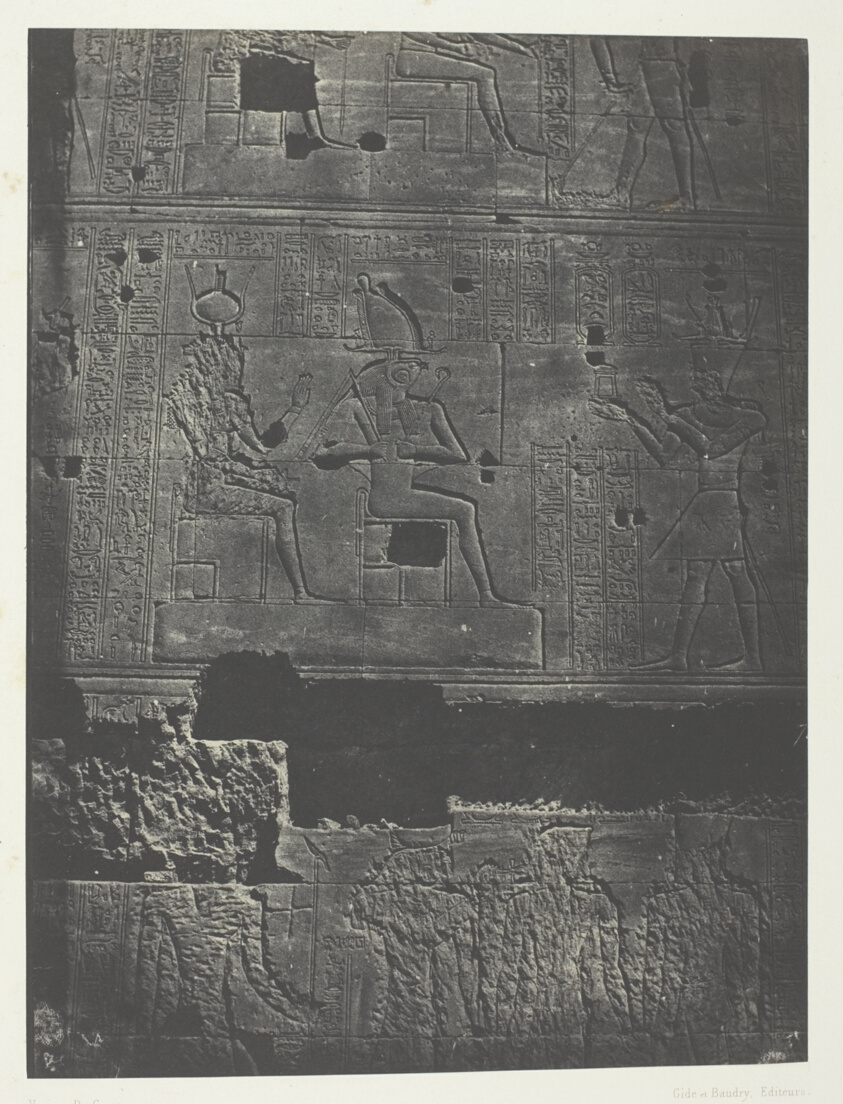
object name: Photograph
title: Muraille Occidentale, Grand Temple d'Isis à Philoe; Nubie, plate 78 from the album "Egypte, Nubie, Palestine et Syrie" (1852)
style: 19th century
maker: Maxime Du Camp (French, 1822–1894)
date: 1849/51, printed 1852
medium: Salted paper print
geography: France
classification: salted paper print; photographic process; photography; photograph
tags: Collected by Hugh Edwards, Egypte, Nubie, Palestine et Syrie